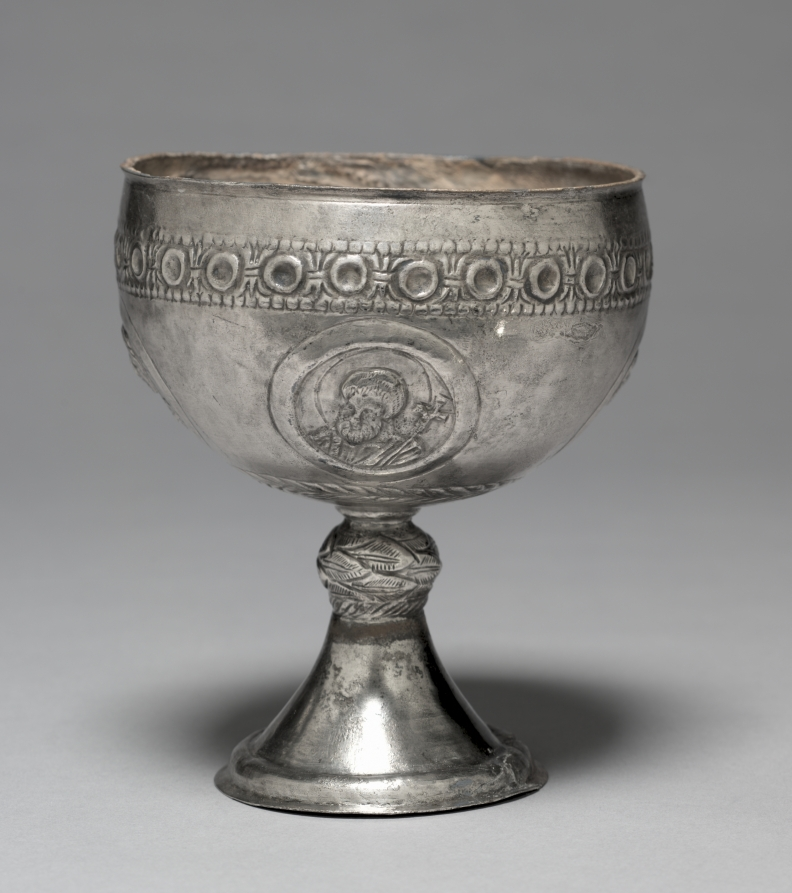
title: Chalice from the Beth Misona Treasure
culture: early Byzantium, Constantinople or Syria, Byzantine period, 6th-7th Century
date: c. 500–700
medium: silver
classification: Metalwork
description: These four liturgical silver vessels—a paten and three chalices (1950.378–81)—form what is now called the Beth Misona Treasure, named for the village in northern Syria for which the objects were made. While nothing is known about the exact location and circumstances of the treasure's discovery, the people of the village of Beth Misona were, like other Christian communities in Syria and Palestine, probably forced to bury their church silver to hide it from the Persians or Arabs, who conquered their lands in the first half of the 600s. The paten, which held pieces of Eucharistic bread used during Mass, is decorated with an engraved Latin cross surrounded by a dedicatory inscription that names the paten's donor—Domnos—and its original location, the church of Saint Sergios in Beth Misona. The chalices, which contained the Eucharistic wine used during Mass, feature broad cups decorated with portrait busts of Saints Peter and Paul, Christ, and the Virgin. One chalice bears a dedicatory inscription naming its donor—Kyriakos, Domnos's son—and the priest of the church that received the pious gift—Zeno.